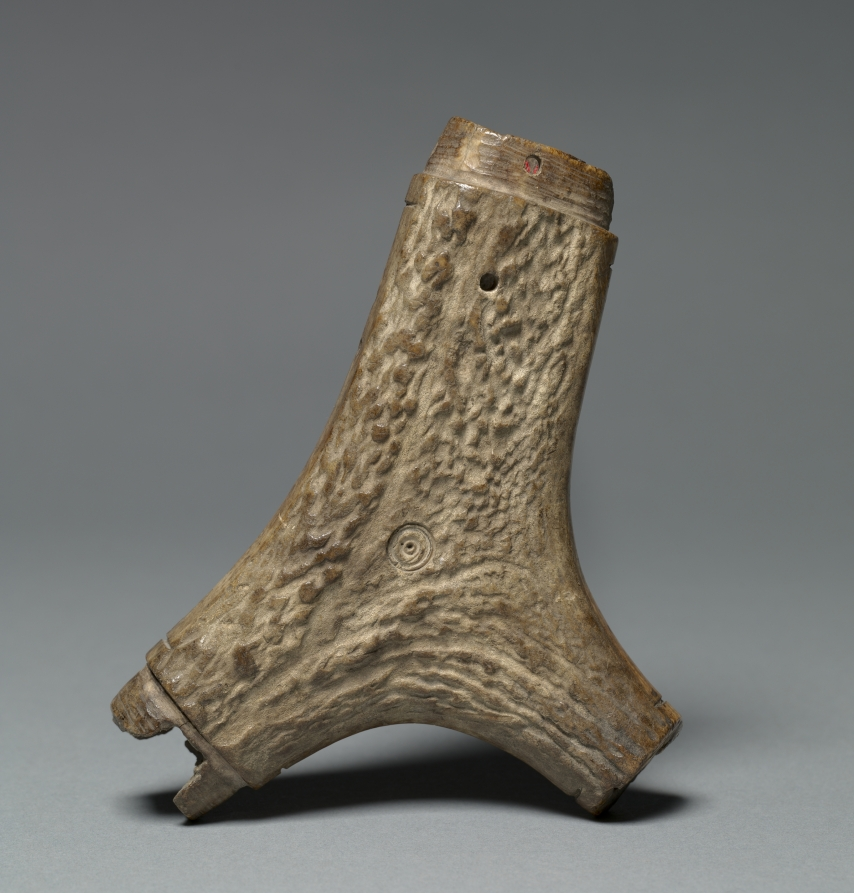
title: Powder Flask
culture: Germany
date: c. 1570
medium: staghorn (two branches) carved with relief scene of Judith and Holofernes; mounts missing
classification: Arms and Armor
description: Powder flasks are small, portable containers designed to hold gunpowder. From the 1400s to the 1800s, powder flasks were indispensable for charging and priming firearms of all types. Without powder flasks firearms were of little use to their owners. Many highly decorated flasks rank as works of art. During the 1500s, they were frequently decorated with images of famous historical figures. Here the figures of Judith and Holofernes derive from the Old Testament.